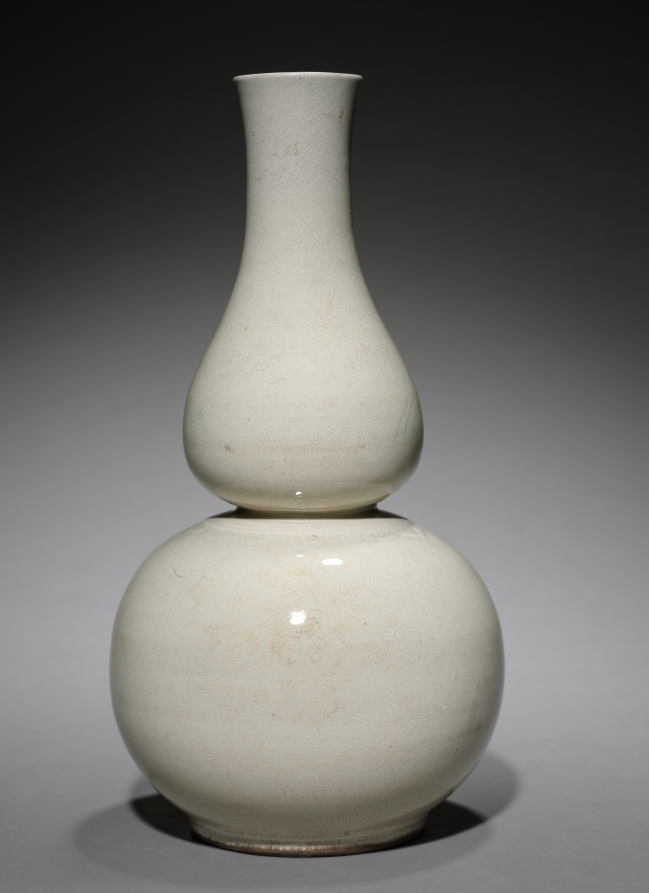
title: Double Gourd-shaped Bottle: Ding ware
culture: China, Ming dynasty (1368–1644)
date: 1368–1644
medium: porcelain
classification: Ceramic